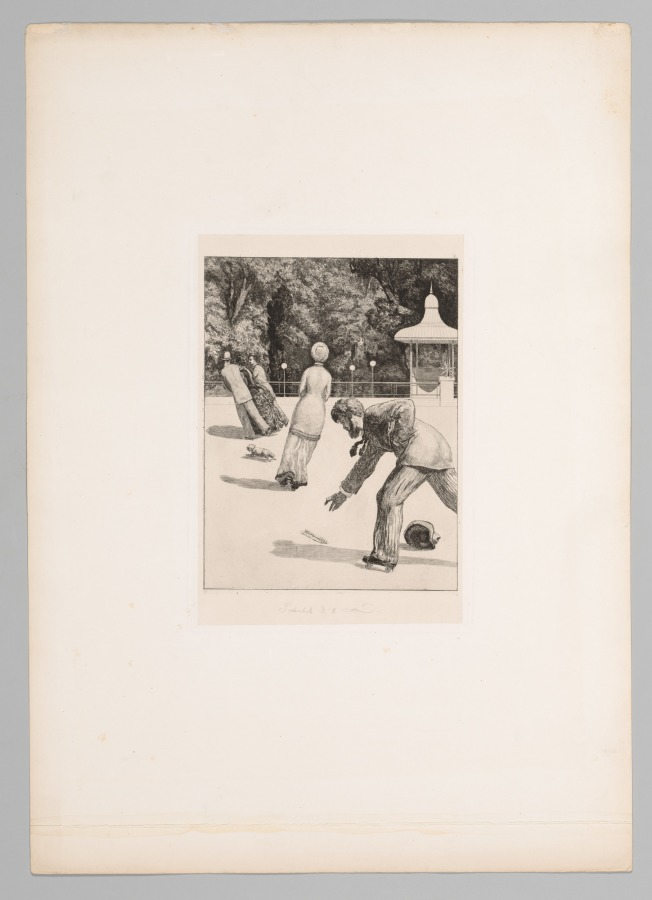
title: A Glove: The Action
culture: Germany, 19th century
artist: Max Klinger (German, 1857–1920)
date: 1880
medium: etching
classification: Print